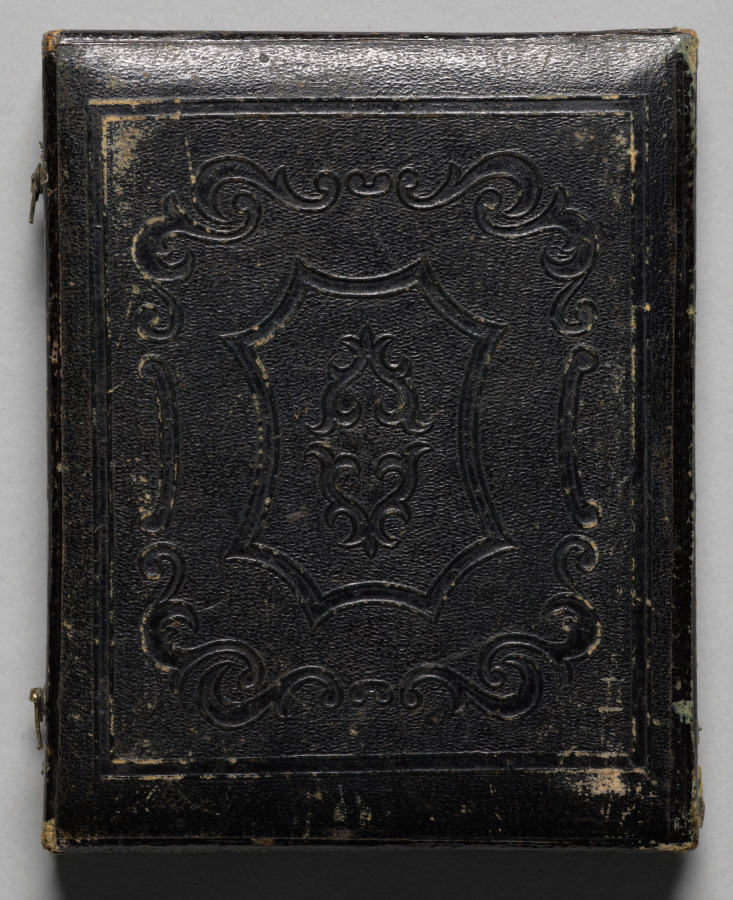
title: The Map Maker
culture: America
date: c. 1843–45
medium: daguerreotype, quarter plate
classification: Photograph